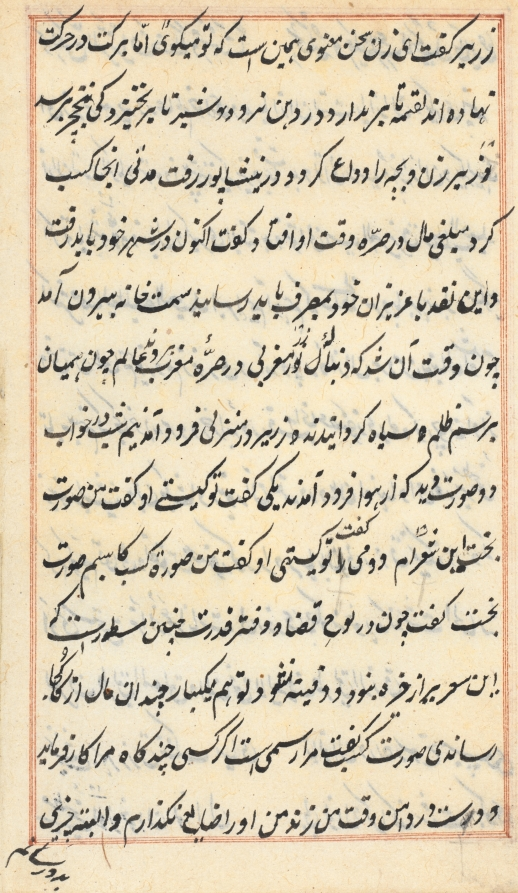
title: Page from Tales of a Parrot (Tuti-nama): text page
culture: Mughal India, court of Akbar (reigned 1556–1605)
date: c. 1560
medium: gum tempera, ink, and gold on paper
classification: Painting